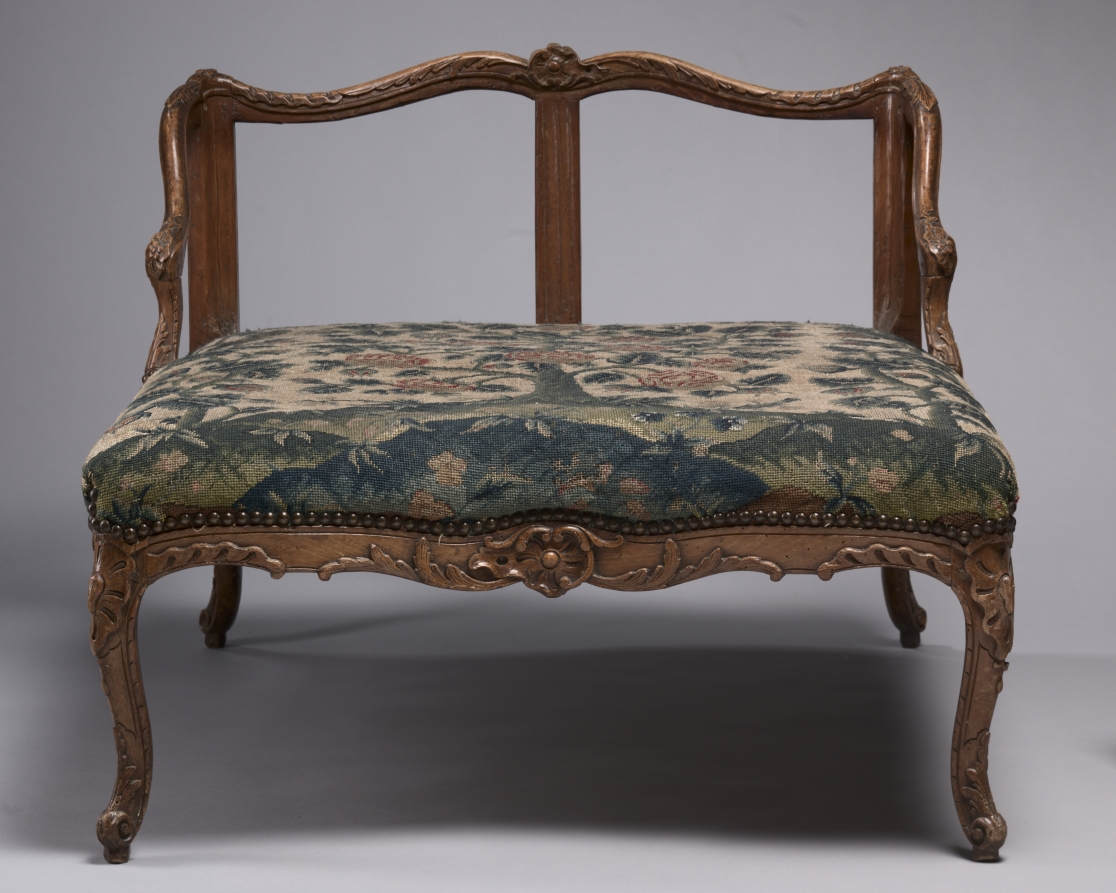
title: Chaise Lounge (Stool)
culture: France, style of Louis XV, 20th century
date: c. 1890–1940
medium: carved wood frame upholstered in needlework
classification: Furniture and woodwork